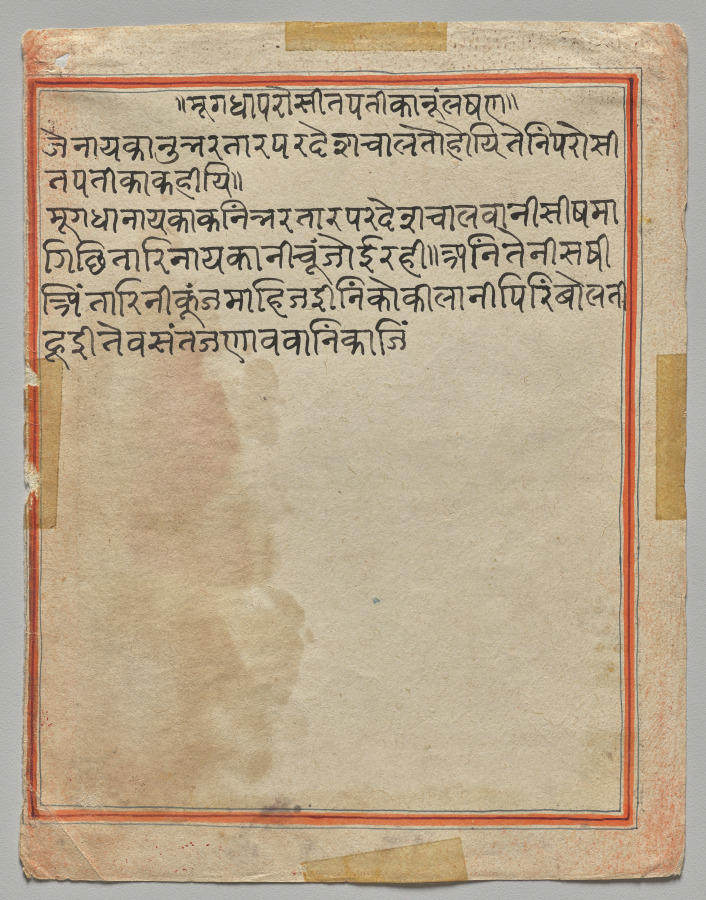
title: A Young, Angry Heroine, Folio 28 from a Rasamanjari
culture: Northwestern India, Rajasthan, Rajput Kingdom of Mewar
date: c. 1615–20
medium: Gum tempera, ink, and gold on paper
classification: Painting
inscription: Recto, upper center: You are expert in flirtation; you are charming; you are my lord and wonderful in your youthful handsomeness.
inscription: Recto, center: Madya Dhira Adhira.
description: The scene of a conversation between two lovers is set within a bedchamber, golden curtains pulled up. The heroine sits on the bed, with three long-necked wine vessels on the wall behind her. A brass ewer for washing with water is on the floor behind the bed.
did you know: Men applied fragrant black pastes to their underarms.